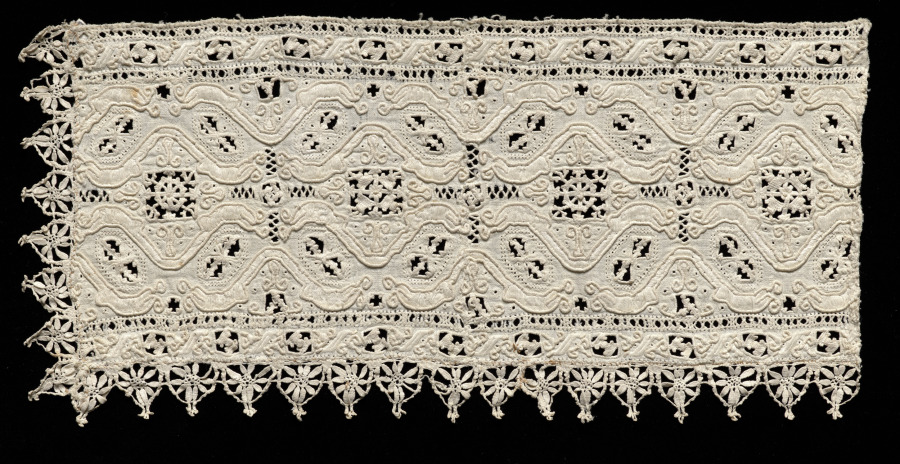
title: Edging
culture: Italy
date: 1500s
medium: Linen: needle (cutwork) and bobbin lace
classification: Lace